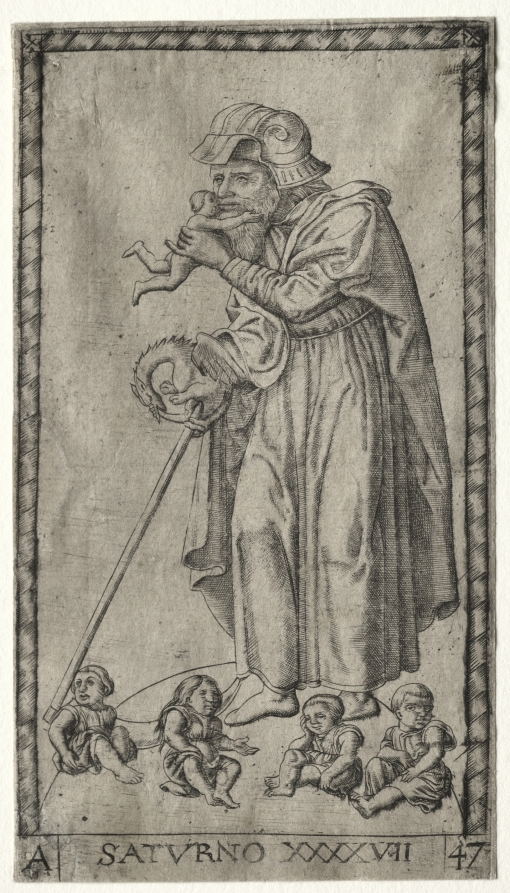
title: Saturn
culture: Germany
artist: Johannes Ladenspelder (German, 1512–after 1561)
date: 1547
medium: engraving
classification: Print